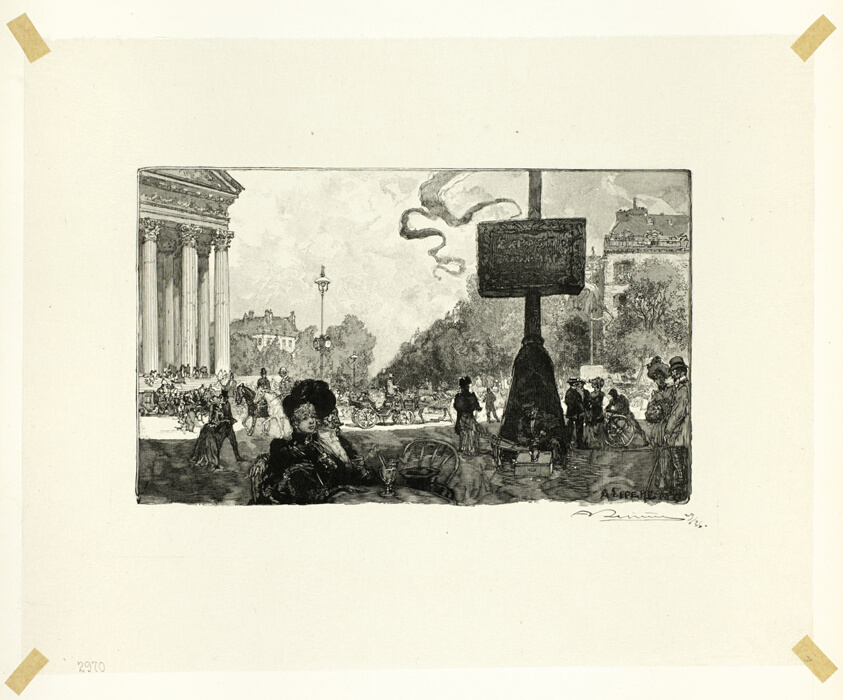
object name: Print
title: Corner of the Rue Royale, plate sixteen from Le Long de la Seine et des Boulevards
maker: Louis Auguste Lepère (French, 1849-1918); published by A. Desmoulins (French, active c. 1908-1910)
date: 1890, published 1910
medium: Wood engraving in black on cream Japanese tissue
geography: France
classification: wood engraving; print; prints and drawing